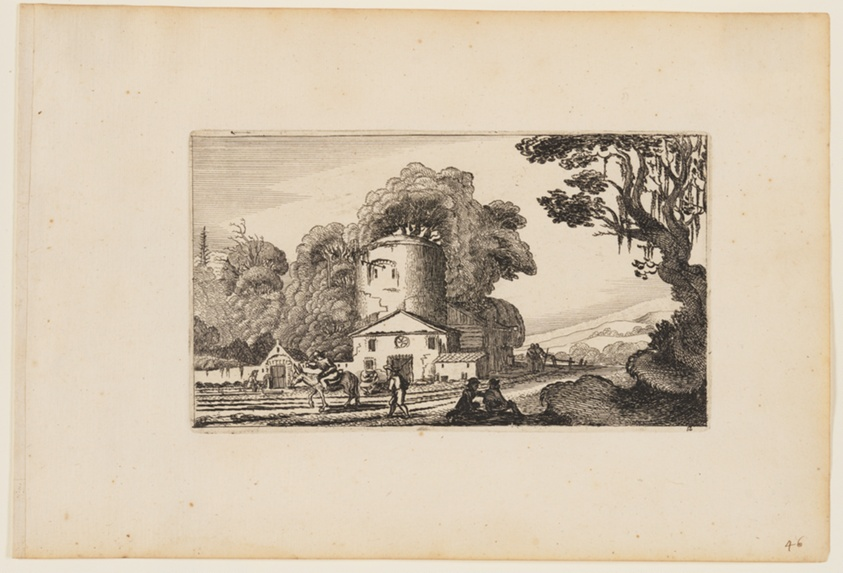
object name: Print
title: Path Before Farm Dominated by a Round Tower, from Twelve landscapes with Figures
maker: After Gillis van Scheyndel; Dutch, 1595–1660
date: 1624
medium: Etching on ivory laid paper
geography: Netherlands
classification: etching; paper; print; prints and drawing